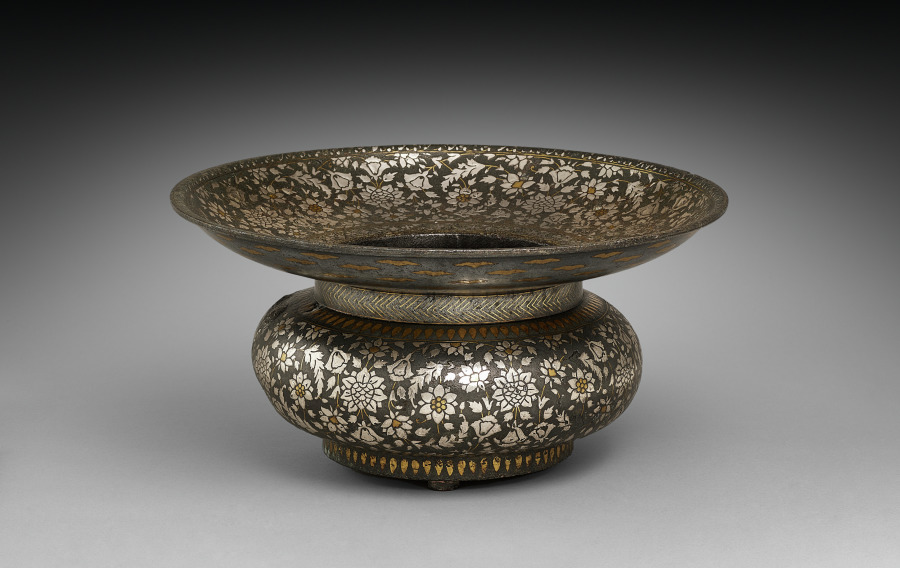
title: Bidri Basin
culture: Southwestern India, Deccan, Karnataka, Bidar​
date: c. 1650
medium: Zinc alloy with silver and brass inlay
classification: Metalwork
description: Wide-rimmed basins called sailabchi were used to catch water poured from a pitcher during hand washing before prayer and before and after meals. A sumptuous example such as this was made for an elite setting. Every element of the allover floral arabesque was cut from silver and brass sheets or wire and hammered into the cast zinc alloy vessel in a distinctive technique developed in southern India.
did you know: Zinc alloy does not rust or corrode, in contrast to steel or copper alloys.